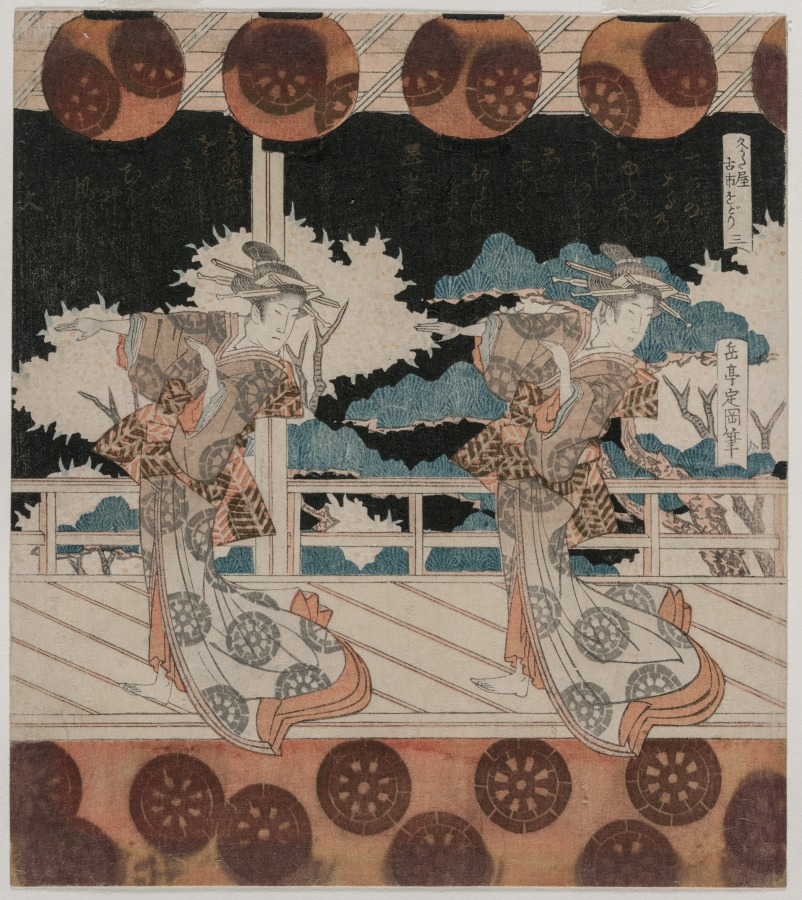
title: Furuichi Dance at the Hisagataya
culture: Japan, Edo period (1615–1868)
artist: Gakutei Harunobu (Japanese, 1786(?)–1868)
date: mid 1820s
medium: Third of a pentaptych of woodblock prints; ink and color on paper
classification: Print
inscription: Signature: Gakutei Sadaoka hitsu